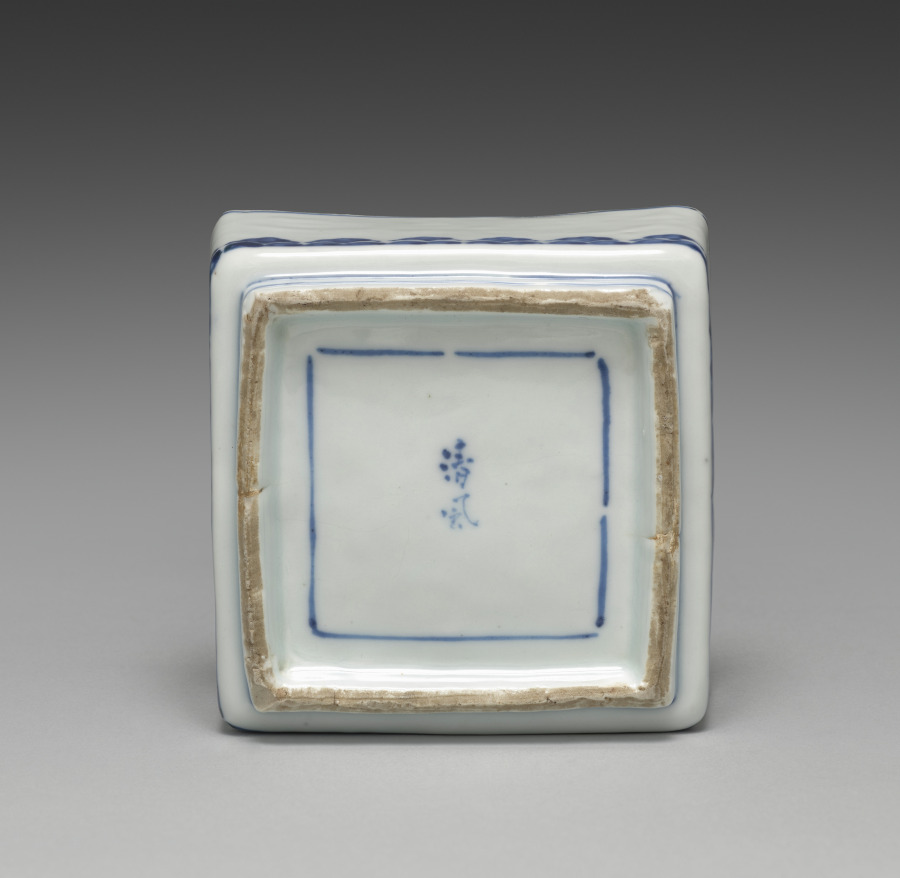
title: Box with Butterfly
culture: Japan, Meiji period (1868–1912)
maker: Seifū Yohei I (Japanese, 1801–1861)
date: 1855–57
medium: Porcelain with underglaze blue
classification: Ceramic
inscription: 清風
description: This sturdy box, with comparatively thick walls and resulting heft, is sparsely decorated with a single butterfly motif in dark underglaze blue cobalt in one corner of the lid and with repeating floral patterns along the lid and base. Single broken lines of underglaze blue define the edge of the box lid’s top where it curves to meet the sides and again where it meets the base of the box. Another blue band runs around the upper rim of the base where it meets the lip, left unglazed for a better grip of the lid when the box is closed. Yohei I’s signature on the center of the recessed base is set within a wide blue square. The porcelain box is meant to call to mind a famous story attributed to Zhuang Zhou (c. 369–286 BCE), also known as Master Zhuang, or Zhuangzi, pronounced Soji in Japanese. The second chapter of Zhuangzi, his eponymous collection of anecdotes, records the story as follows: Once, Zhuang Zhou dreamt he was a butterfly, a butterfly flitting and fluttering about, happy with himself and doing as he pleased. He didn’t know that he was Zhuang Zhou. Suddenly, he woke up and there he was, solid and unmistakable Zhuang Zhou. But he didn’t know if he was Zhuang Zhou who had dreamt he was a butterfly, or a butterfly dreaming that he was Zhuang Zhou. Between Zhuang Zhou and the butterfly there must be some distinction! This is called the Transformation of Things. The lidded box resembles kosometsuke, the porcelains in underglaze blue made to order or on speculation for the Japanese market during the early to mid-1600s in Jingdezhen, China. These works were often made from designs submitted by Japanese clients, many of whom were masters of chanoyu, who sought the wares for their tea practice. The relative roughness of the clay and the distortions in the fired object were intentional, as they created the rustic effect desired by Japanese tea communities.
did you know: Seifū Yohei I made blue and white porcelains after Ming dynasty (1368–1644) Chinese wares fired in the kilns at Jingdezhen for export.